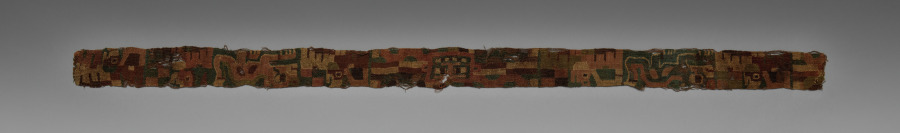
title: Fragment of a Belt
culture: Peru, South Andes, Tiwanaku style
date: c. 400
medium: camelid wool; tapestry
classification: Textile